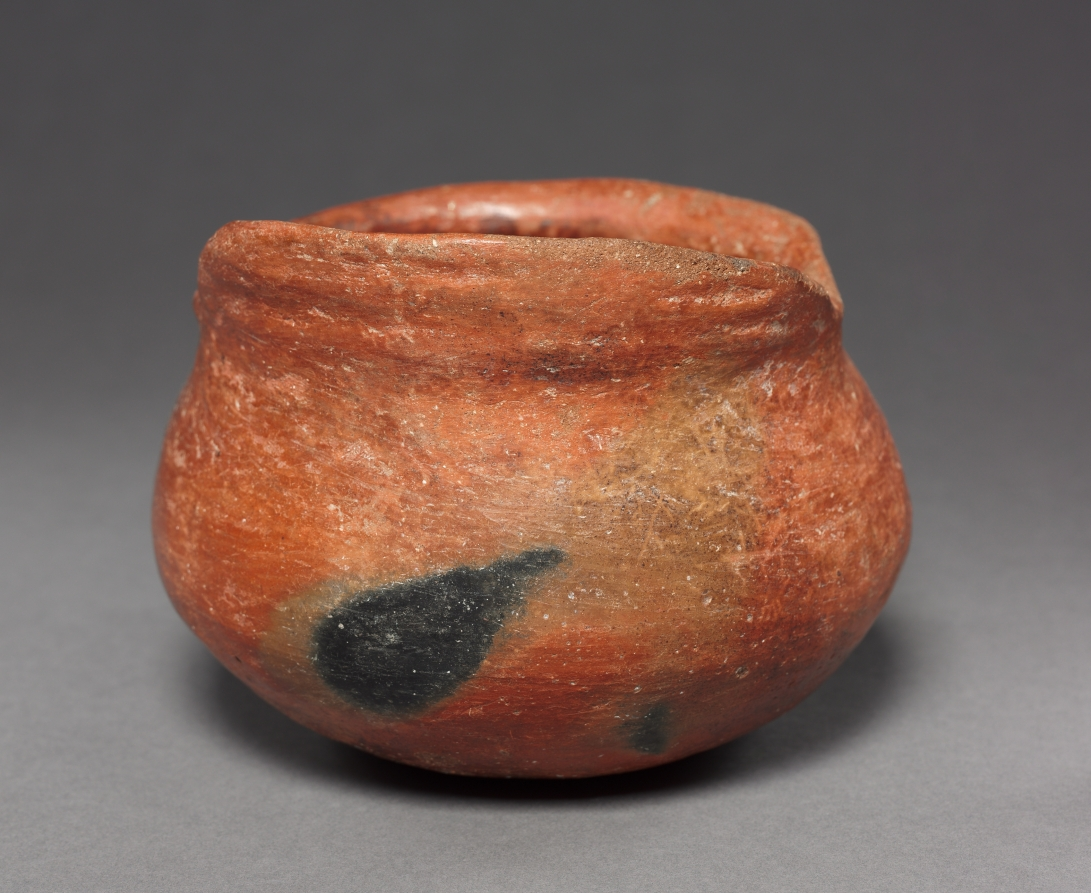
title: Head Effigy Bowl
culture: Mexico, Region of Tilantongo, District of Tlaxiaco, Nayarit style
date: 100 BCE–300 CE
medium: pottery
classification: Ceramic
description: After about 200 BC, West Mexican chieftains gained in authority, their new status reflected in shaft tombs that shelter not only their remains but also lavish offerings, including sculptural ceramics. Many of the ceramics may refer to the crucial activities of a chief’s life, such as marriage, feasting, and war. The meaning of this unusual bowl—a head whose gaping mouth serves as the aperture—is unknown.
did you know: Ancient Nayarit art is celebrated for its timeless, often lighthearted expressions of humanity.